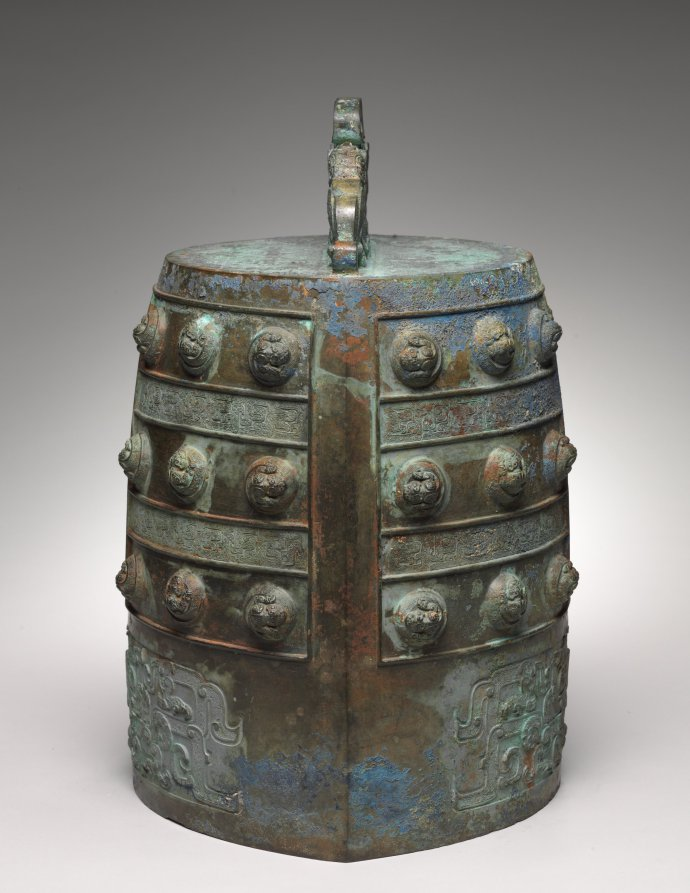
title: Bell (Bo Zhong)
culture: China, Eastern Zhou dynasty (770–256 BCE)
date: early 400s BCE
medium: bronze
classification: Metalwork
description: Music in the Eastern Zhou dynasty not only served ritual purposes but also provided entertainment in feudal courts. The elliptical cross-section of the Chinese bronze bell is unique; it could produce two notes depending on where the bell is struck, either at the rim or near the center. The bell is suspended when played and often belongs to a graduated set arranged according to pitch and size. This bell displays elaborate ornamentation and exquisite workmanship. A twin-bodied serpent intertwined with two tigers forms the suspension loop at the top. Coiled serpents form the knobs on the body. The lower part bears an animal mask, its horns interlaced with abstract bird designs.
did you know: The bell could produce two notes depending on where it is struck.